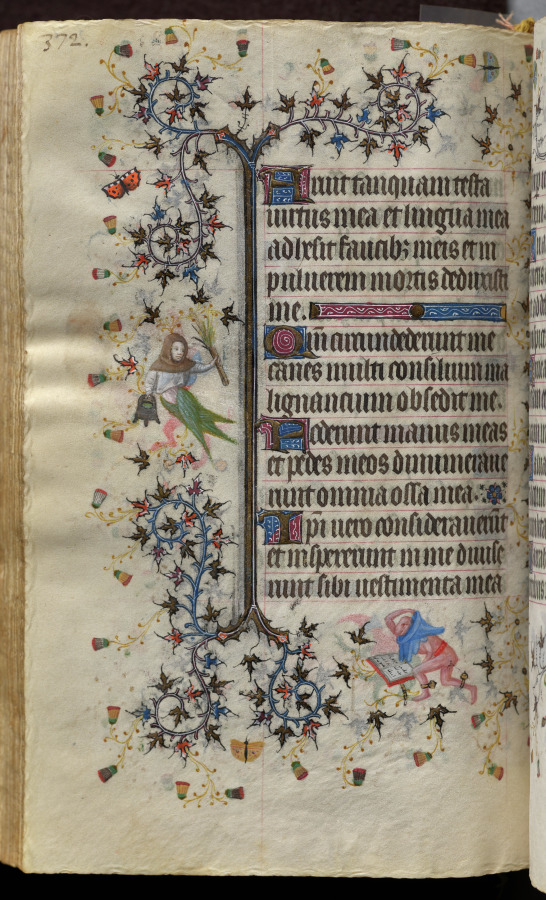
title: Hours of Charles the Noble, King of Navarre (1361-1425): fol. 181v, Text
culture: France, Paris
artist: Master of the Brussels Initials and Associates (French)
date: c. 1405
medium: ink, tempera, and gold on vellum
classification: Bound Volume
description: This precious volume was obviously highly prized by its owner, the French-born King of Navarre, who had his coat of arms painted on no less than twenty folios. Rather than directly commissioning this manuscript from a specific workshop, it seems that Charles the Noble acquired his book of hours -- perhaps ready-made for the luxury market -- while on a trip to Paris in 1404-05. A collaborative effort, six painting styles are evidenced within the pages of this codex, those of two Italians, two Frenchmen, and two Netherlanders. The painter who was responsible for the planning and decoration of the book, and who produced seventeen of the large miniatures, was a Bolognese artist known as the Master of the Brussels Initials. His principal assistant, responsible for most of the borders, was a Florentine who signed his name "Zecho" da Firenze on folio 208 verso.